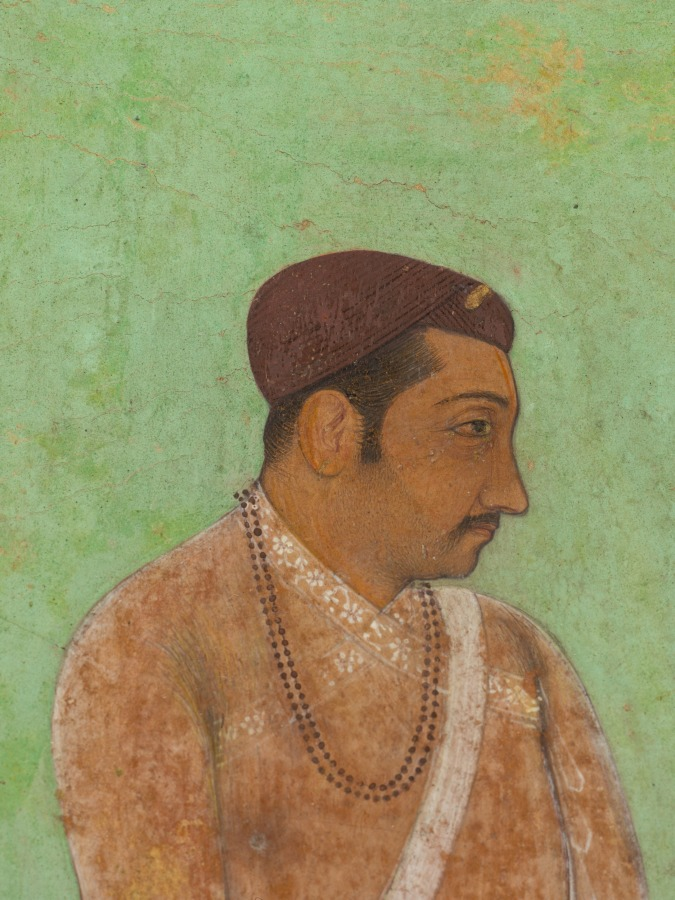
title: Portrait of Suraj Singh Rathor, Raja of Marwar and Maternal Uncle of Shah Jahan: A Page from the Prince Khurram Album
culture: India, Mughal court, early 17th century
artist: attributed to Bishandas (Indian, active c. 1610–30)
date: c. 1600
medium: Gum tempera and gold on paper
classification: Painting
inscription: inscribed in hand of Shah Jahan in lower inner border: shabihi Raja Suraj-Singh Rathor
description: This true-to-life portrait depicts the maternal uncle of the Mughal prince Khurram (1592-1658), who would later become the emperor Shah Jahan. His clothing and accessories-especially the six-pointed wrapped tunic made of prized translucent muslin-reveal his wealth and status. The artist’s skillful brushwork conveys the varied textures of the fabrics and sensitively renders his patient, somewhat weary expression. Prince Khurram selected this painting for inclusion in an album he assembled in 1612. Suraj Singh was a Hindu prince from Marwar, a Rajput kingdom under the auspices of the Mughal empire. His sister, a Marwar princess, was the third wife of the Mughal emperor Jahangir. Intermarriage with Hindu families is one example of the ecumenism of the early Mughal emperors, who adhered to a liberal form of Islam. Suraj Singh died of natural causes while on a military campaign with Prince Khurram in the Deccan in 1619.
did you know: Emperor Shah Jahan himself wrote the label inscription under the painting.